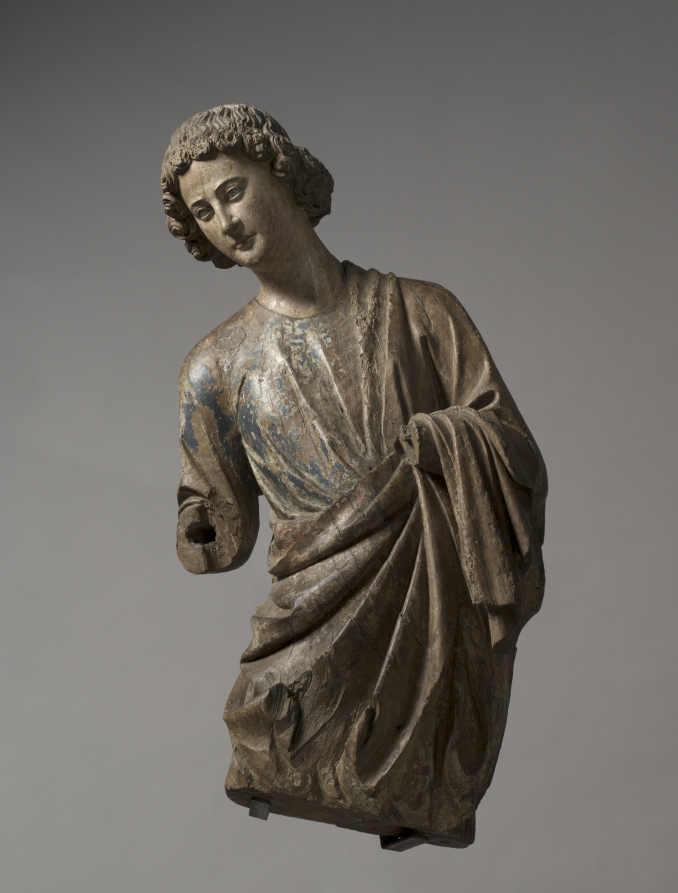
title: Angel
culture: France, vicinity of Reims, 13th century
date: c. 1250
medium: walnut with traces of gilding and polychromy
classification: Sculpture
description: Surviving in fragmentary condition, this pair of angels lacks lower arms, hands, wings, and attributes. Their original paint and gilding, now almost entirely lost, once rendered their garments a rich brocade and their hair a luxuriant gold. Nonetheless, in their graceful poses and sublime faces—which may portray tragic interest, anguish, or deep concern—their original delicacy and power are still evident. They embody the monumental style of 13th-century High Gothic cathedral sculpture in France. Their style specifically suggests they were carved in or around Reims, possibly by sculptors associated with the cathedral there. Their original placement is unknown, but they may have flanked an altar on columns.